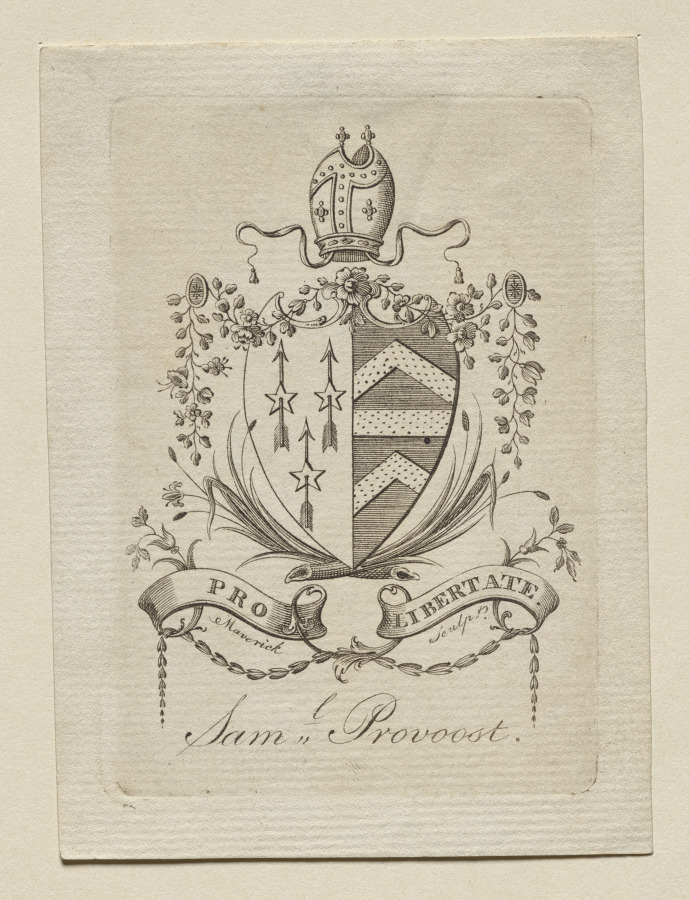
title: Bookplate: Coat of Arms with Sam'l Provoost inscribed below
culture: America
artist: Peter Rushton Maverick (American, 1755–1811)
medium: engraving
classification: Print